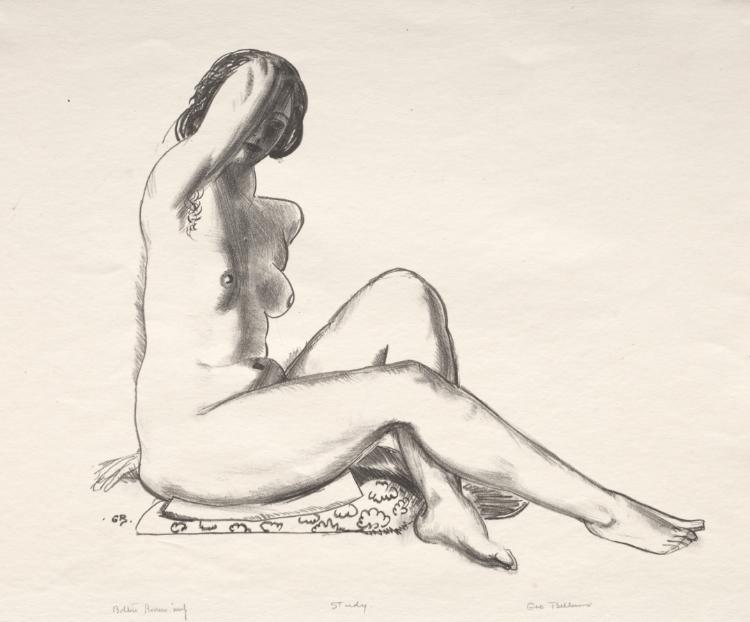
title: Nude Study, Girl Sitting on a Flowered Cushion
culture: America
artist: George Bellows (American, 1882–1925)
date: 1923–1924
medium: lithograph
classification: Print